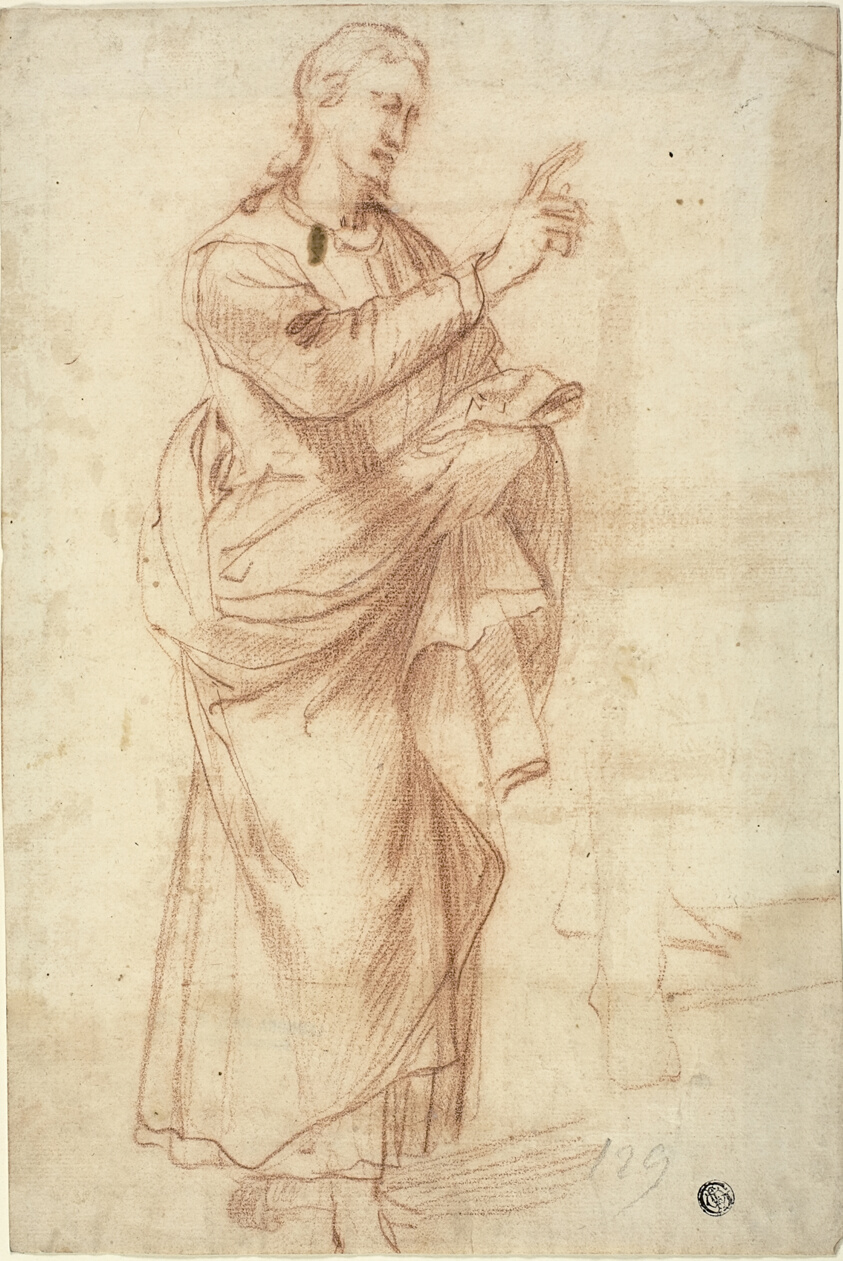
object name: Drawing and Watercolor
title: Christ Teaching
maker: Circle of Ludovico Cardi, called Il Cigoli; Italian, 1559-1613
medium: Red chalk, on ivory laid paper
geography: Italy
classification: chalk; drawings (visual works); prints and drawing